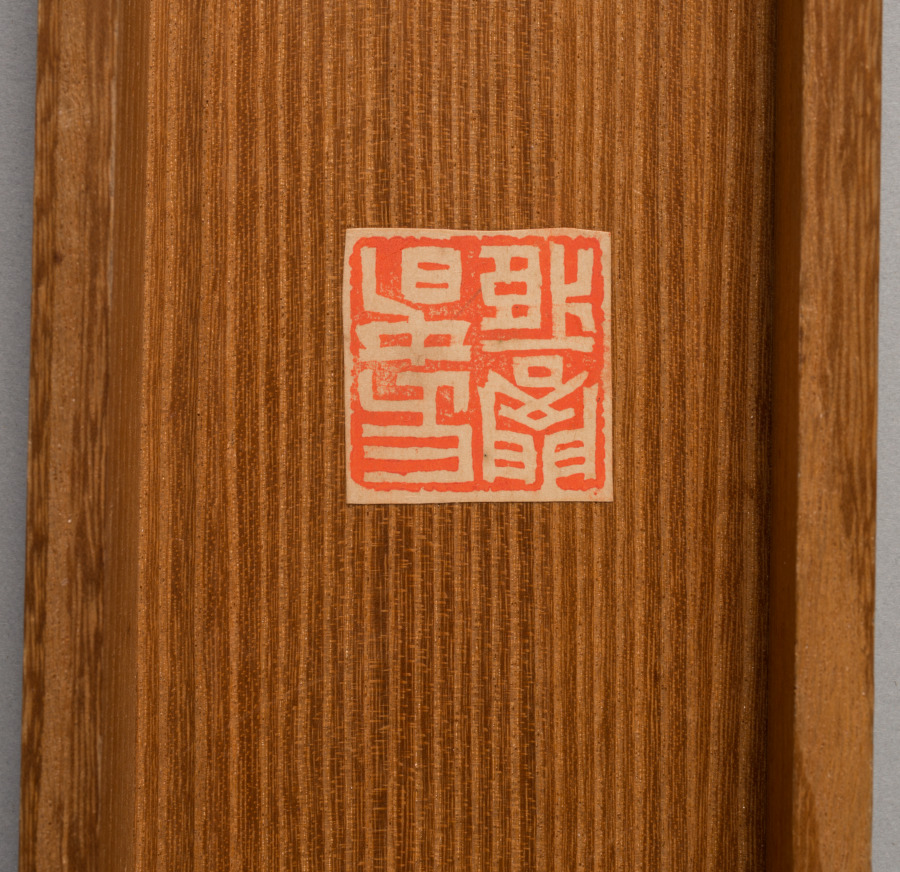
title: Monju with Five Hair Knots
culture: Japan, Kamakura period (1185–1333)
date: late 1200s–early 1300s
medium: Hanging scroll; ink, color, gold, and cut gold on silk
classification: Painting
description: This Buddhist painting shows Monju, Manjushri in Sanskrit, riding a lion. Monju is a bodhisattva, a being who, though enlightened, chooses not to become a Buddha but instead helps others achieve enlightenment. Monju’s youthfulness symbolizes his pure wisdom, unsullied by the world, and his five hair knots represent his vow to keep calamity at bay. The supernatural nature of his lion is emphasized by its hair, every strand painted in gold, as well as by the lotus platforms beneath each of its feet. The boy’s bejeweled body and silk finery is meant to resemble that of an Indian prince.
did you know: This painting is exemplary of the Kamakura period, known for artworks with special attention paid to the realism of images.